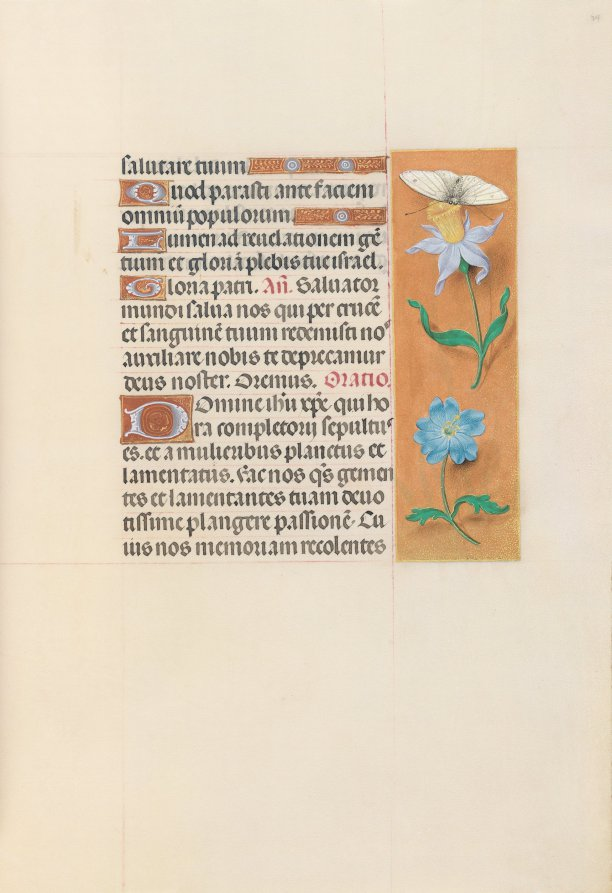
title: Hours of Queen Isabella the Catholic, Queen of Spain: Fol. 79r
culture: Flanders, Ghent and Bruges, late 15th century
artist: Master of the First Prayerbook of Maximillian (Flemish, c. 1444–1519)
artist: and Associates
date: c. 1500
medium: ink, tempera, and gold on vellum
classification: Bound Volume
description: This manuscript was illuminated by a circle of at least five highly organized manuscript painters active in the Flemish cities of Ghent and Bruges. The principal illuminator was Alexander Bening, who painted the majority of the book's miniatures. Manuscripts produced by this circle of artists are renowned for the decoration of their borders, which typically feature a rich variety of realistically-painted flowers, birds, and butterflies. This prayer book, called a book of hours, was intended not for a cleric, but for the private devotions of a lay person-in this case, Isabella the Catholic, Queen of Spain (1451-1504). Isabella's coat of arms embellishes the book's frontispiece. It is unlikely that the book was commissioned by the Queen herself; rather, she probably received it as a diplomatic gift from someone courting her patronage, perhaps Cardinal Francisco Jimenez de Cisneros. A Franciscan friar, Jimenez was dependent upon Isabella for his advancement, first to the post of Queen's confessor in 1492, and then to Archbishop of Toledo in 1495.